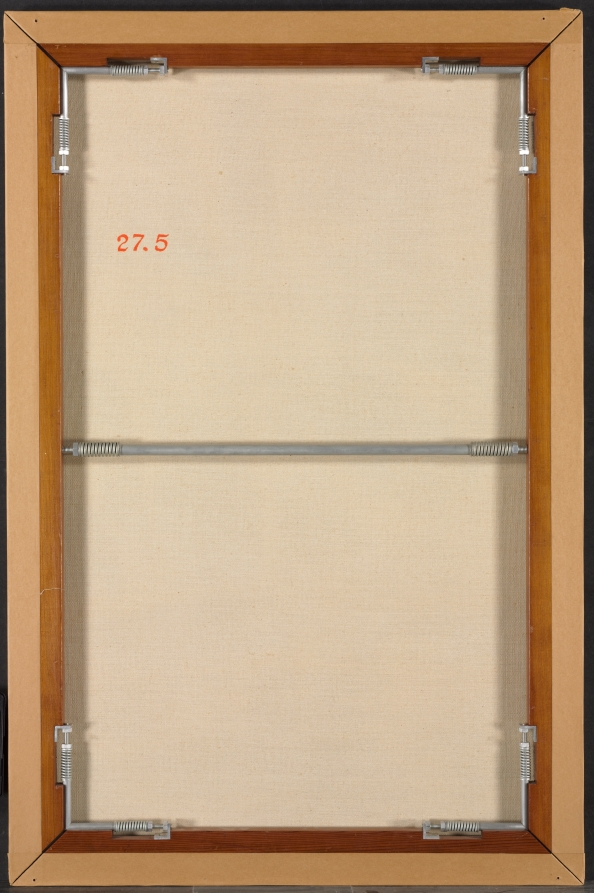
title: A Summer Afternoon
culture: America, Ohio, Cleveland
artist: R. Way Smith (American, 1840–1900)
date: 1882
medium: oil on canvas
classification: Painting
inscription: signed lower right: R. Way Smith 82; signed on back of canvas: A Summer Afternoon R. Way Smith 81.